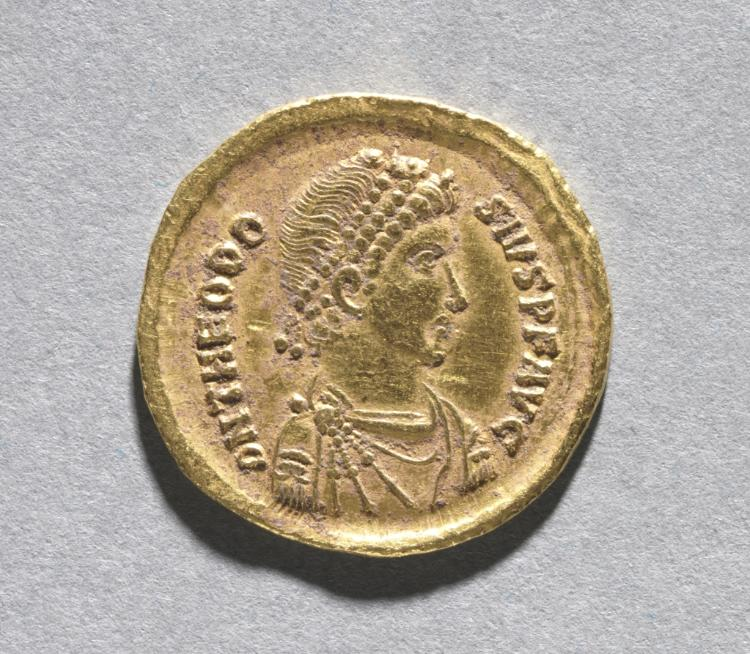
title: Solidus of Theodosius I the Great (obverse)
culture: Byzantium, Constantinople, Byzantine period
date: 383–88 CE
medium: gold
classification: Coins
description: Byzantine Gold Coins The vast number of surviving Byzantine coins attests to the level of trade across the empire. Controlled and supervised by the emperor, the producers of coins took care to represent his authority and reflect his stature. Talented artists were recruited to engrave the dies (molds) used for the striking of coins. Emperors increasingly came to include their heirs and co-emperors on their coinage, as well as other family members or even earlier rulers. Coins were recognized, then as now, as small, portable works of art. With their inscriptions and images, Byzantine coins provide valuable documentation of historical events and a record of the physical appearance of the emperors. The coins shown here include the solidus, the basic gold coin of 24 karats; the tremissis, a gold coin of one-third the weight and value of the solidus; and the nomisma, which in the 10th century replaced the solidus as the standard gold coin.